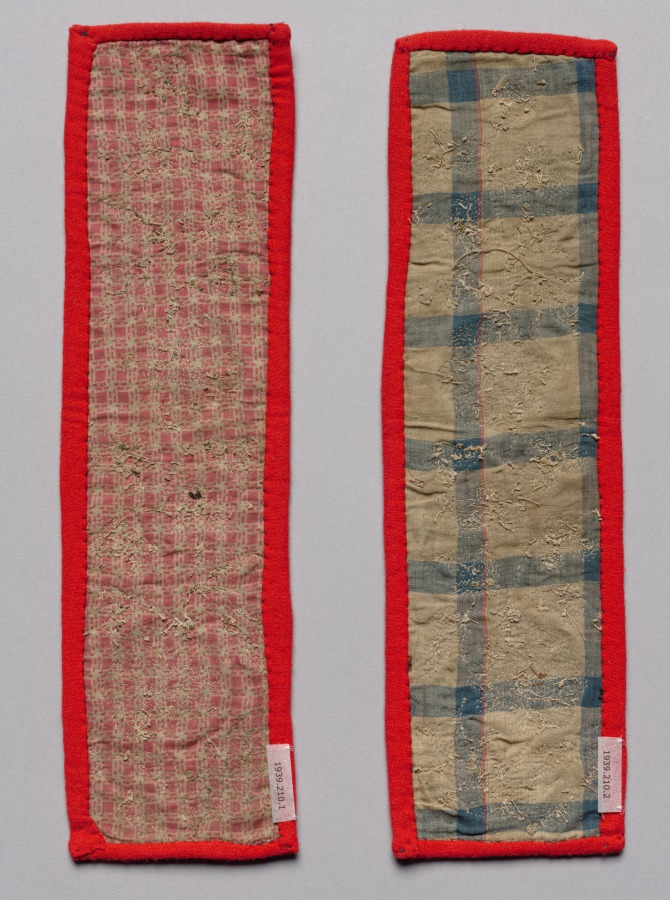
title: Two Beaded Panels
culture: Northeast Woodlands, Great Lakes Region, Anishinaabe (Ojibwe) or Nehiyawak (Cree) People?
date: late 1800s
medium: glass beads on wool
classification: Textile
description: In the 1800s, native peoples began to use European fabrics to fashion fine formal garments; they favored sturdy cloth, such as velvet and wool broadcloth, which provided support for heavy decorative beadwork that was added by hand. Often the fabric was a dark color, providing dramatic contrast for the multicolored beads. Rather than encrusting the entire garment, beadwork was confined to cuffs, “epaulettes,” bib-like plackets and yokes, rectangular panels sewn to leggings, shirts, and dresses, and the like.